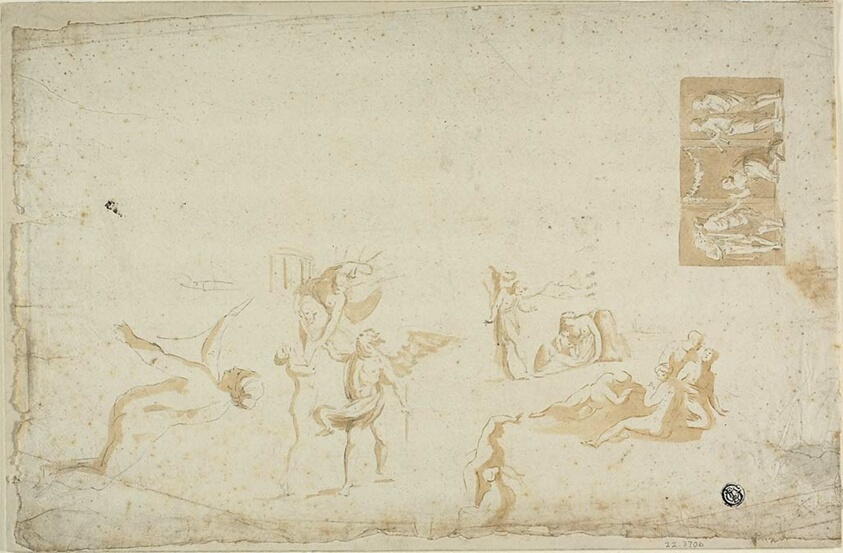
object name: Drawing and Watercolor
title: Sketches of Mythological Subjects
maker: Giovanni Battista Cipriani (Italian, 1727-1785)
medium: Pen and brown ink with brush and brown wash, with graphite, on ivory laid paper, tipped onto buff wove card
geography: Italy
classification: ink or chalk wash; drawings (visual works); prints and drawing